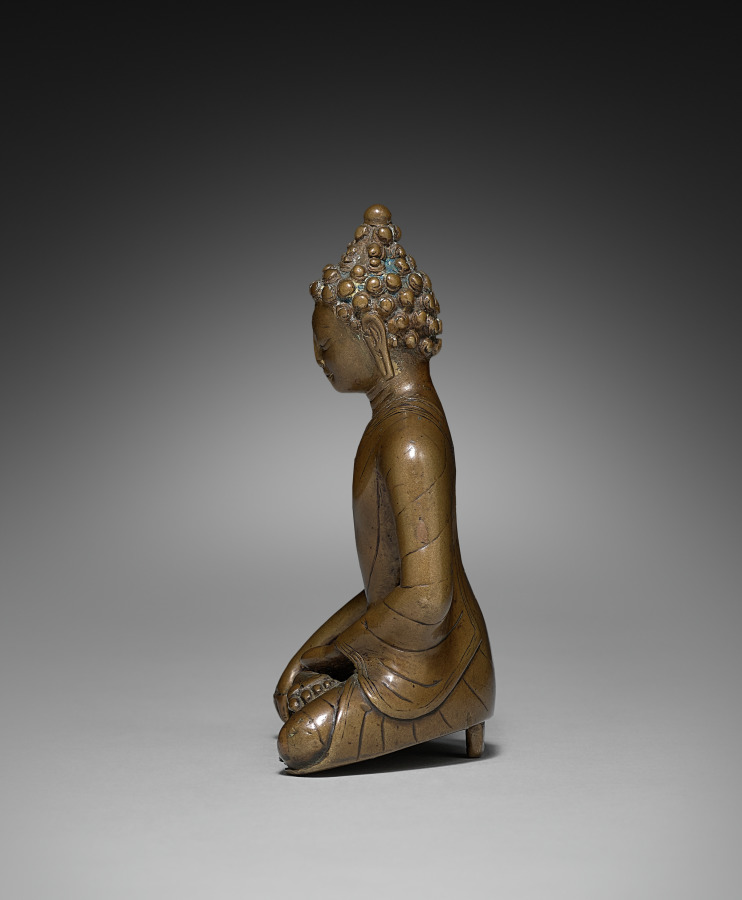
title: Seated Buddha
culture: India, Bengal(?), Pala period, 9th century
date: 800s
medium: bronze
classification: Sculpture